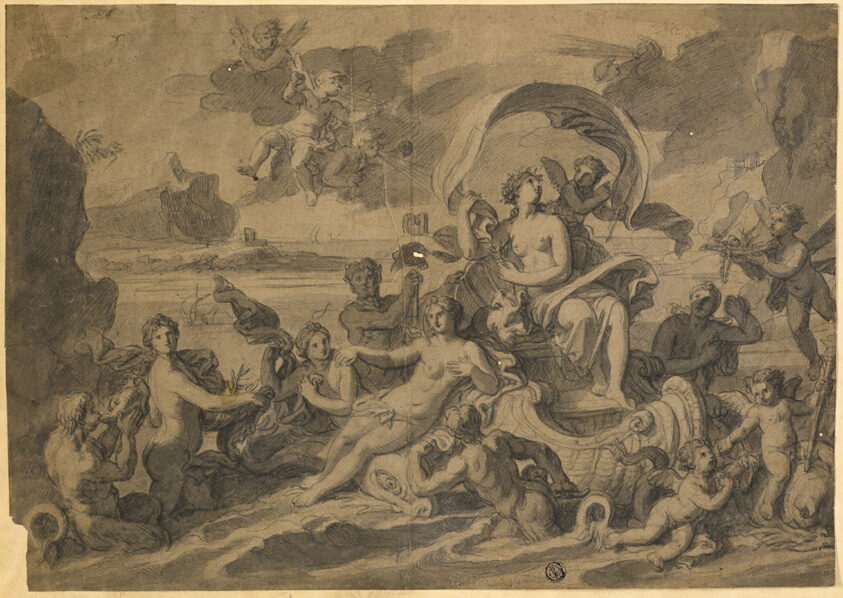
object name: Drawing and Watercolor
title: Triumph of Amphitrite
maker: François Verdier (French, 1651-1730)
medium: Pen and black ink and black chalk, with brush and gray wash, on grayish brown laid paper, laid down on cream wove paper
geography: France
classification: drawings (visual works); prints and drawing